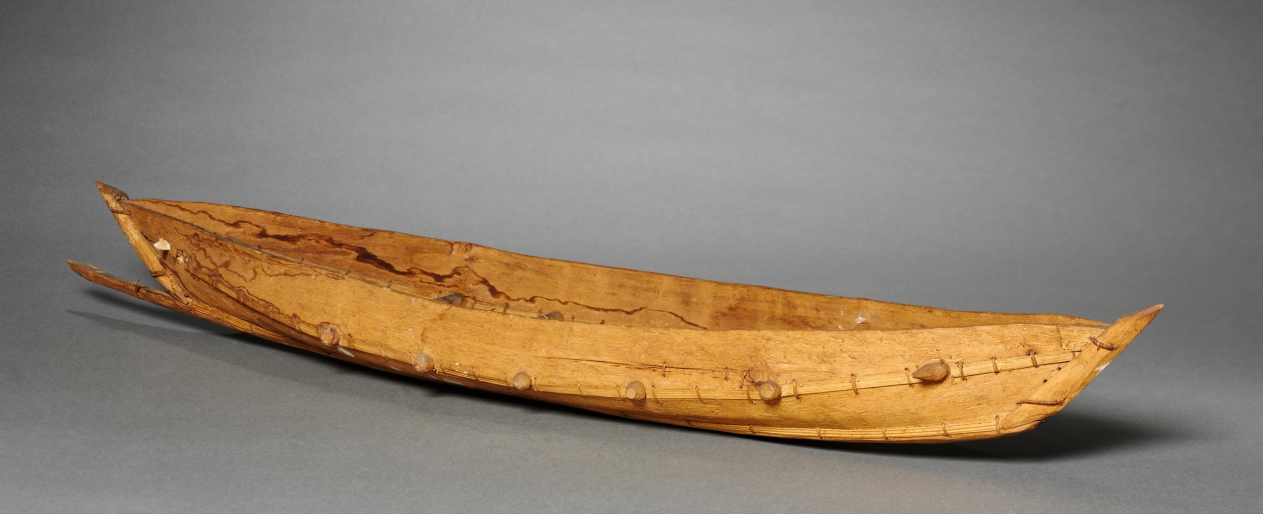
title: Model Canoe and Paddles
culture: Africa, East Africa, probably Uganda, unknown maker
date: 1900s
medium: wood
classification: Furniture and woodwork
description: Made of plain wood, this is a model of a canoe with a prow, seats, and five paddles. Composed of multiple panels sewn together with fibers, it was described in historical museum documents as a "war canoe." Similar examples from around the same period are found in American and European museums, where they had been collected in eastern, central, and western Africa as anthropological artifacts rather than as artworks. While the archives have little information about this object, it appears similar to Ugandan sewn plank canoes and to a model example collected in Uganda between 1890 and 1910 now at the British Museum.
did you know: The small scale and a 1929 description of this object as "modern" suggest it was made for tourists.